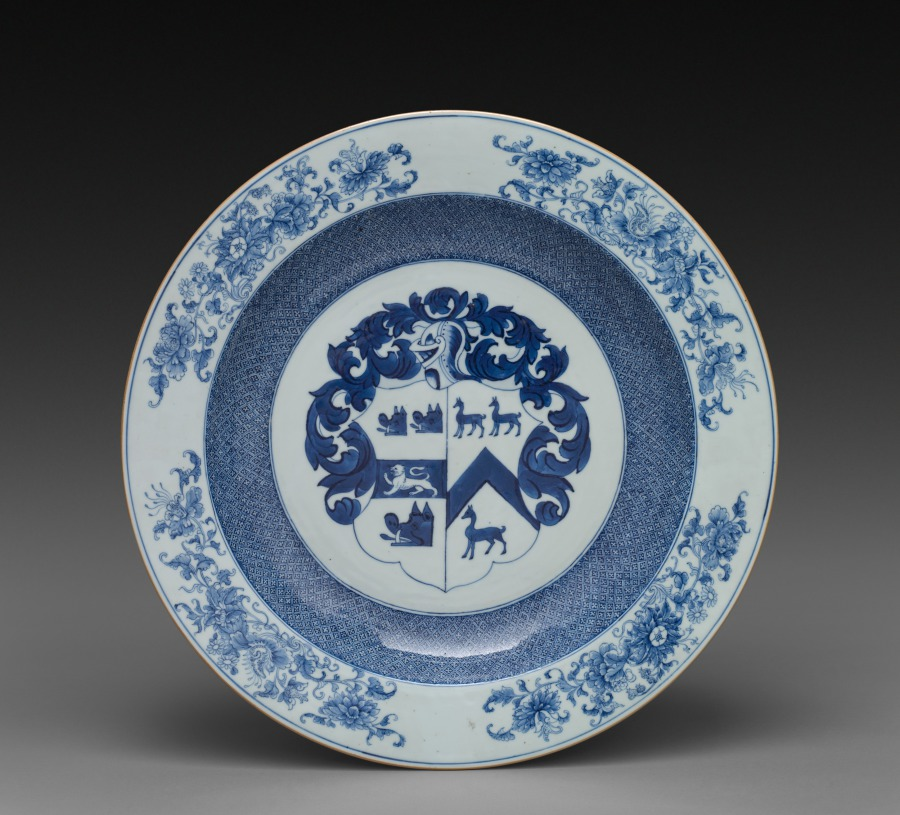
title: Charger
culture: China, Chinese Export -- English Market, 18th century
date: c. 1720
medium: porcelain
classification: Ceramic